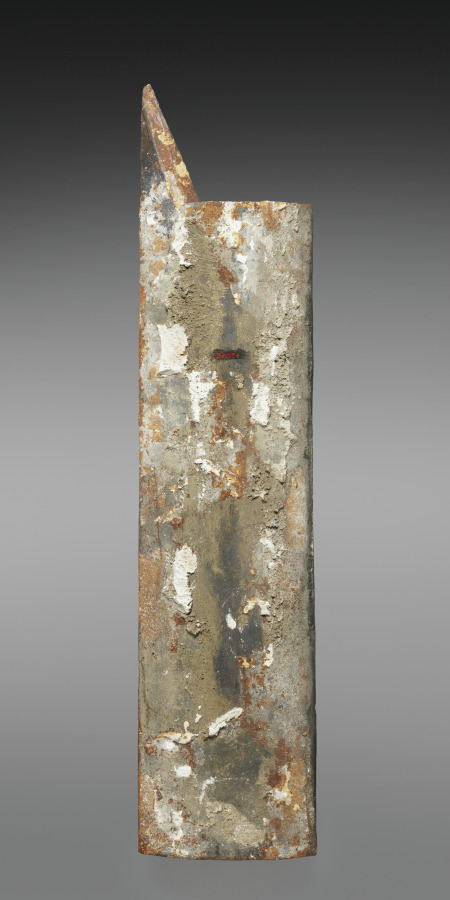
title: Set of Fire Linings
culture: France, style of Louis XVI, 18th Century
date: c. 1770–1780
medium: cast iron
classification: Furniture and woodwork